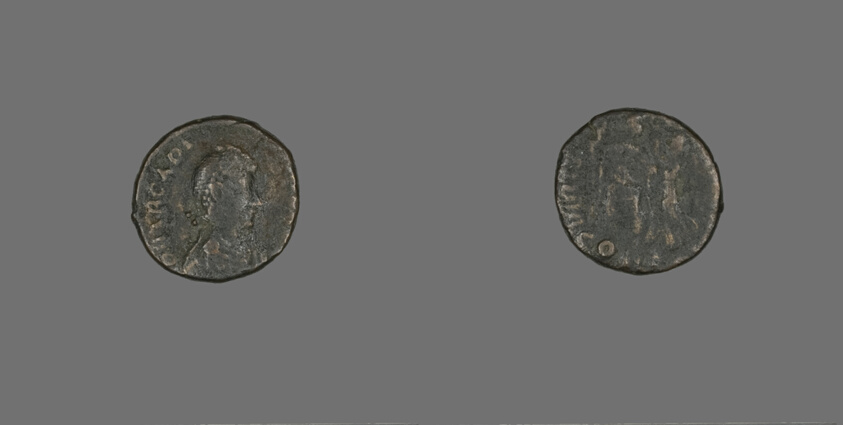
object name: Coin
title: Coin Portraying Emperor Arcadius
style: roman (ancient, style or period), ancient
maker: Roman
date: 383-408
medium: Bronze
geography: Roman Empire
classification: coin; ancient art